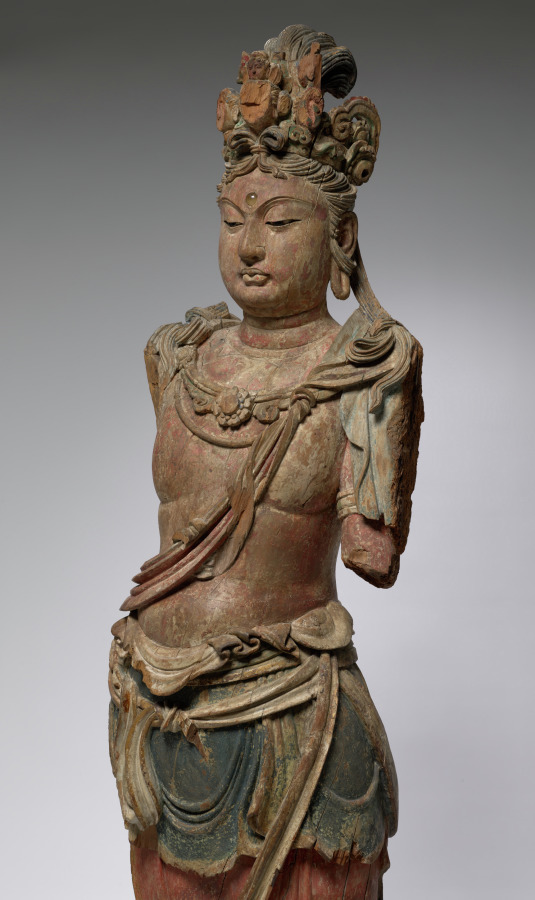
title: Eleven-Headed Guanyin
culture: China, late Northern Song dynasty (960-1127) - Jin dynasty (1115-1234)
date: 1100–1200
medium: wood with polychromy and cut gold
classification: Sculpture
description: The bodhisattva is an enlightened being dedicated to the spiritual awakening of all beings. The compassionate bodhisattva Guanyin, in a variety of manifestations, is probably the most popular deity of worship in Chinese Buddhism. In the Esoteric Buddhist form shown here, this standing Guanyin has a total of eleven heads, with smaller ones above the principal head. The uppermost head represents the Buddha Amitabha, to whom he is closely related. The eleven heads symbolize the Buddha’s steps on the path to enlightenment.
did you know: This Guanyin is carved from a single block of willow (genus Salix sp.).